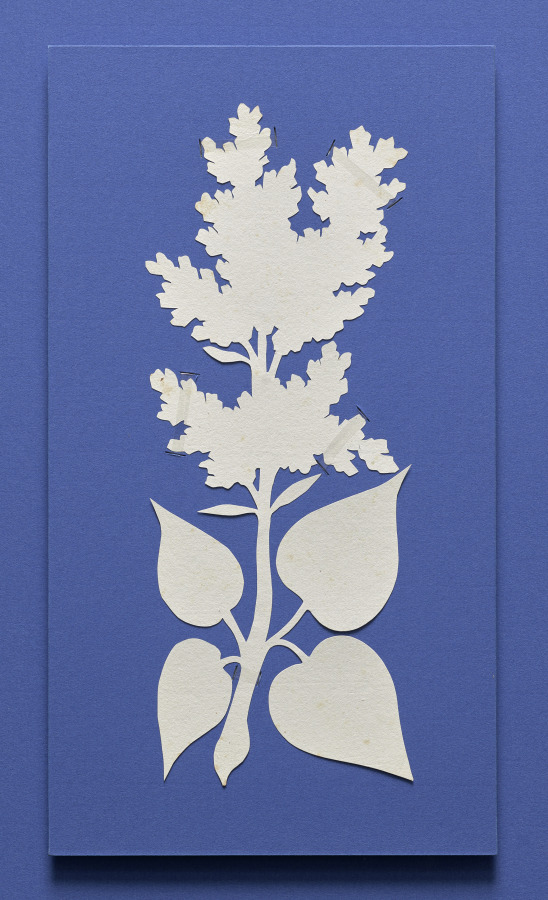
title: Lilac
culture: Germany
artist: Philipp Otto Runge (German, 1777–1810)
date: 1800–1805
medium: Silhouette cut from off-white laid paper mounted to modern blue laid paper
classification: Print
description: Lilac belongs to a series of cut-out silhouettes created by Philipp Otto Runge around the early 1800s. Each presents a plant or flower in exacting detail, including each petal and leaf. The technique used was a traditional folk practice, which Runge learned early on from his mother. He ultimately produced well over one hundred such works, which he occasionally gave as gifts; this work, for example, was offered by the artist to the Specktors, a Hamburg based family of artists.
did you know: Plants and landscape were one of Philipp Otto Runge’s favorite subjects and he once wrote “Is there not then in this new art—call it landscape if you like—a highest point to be achieved?”